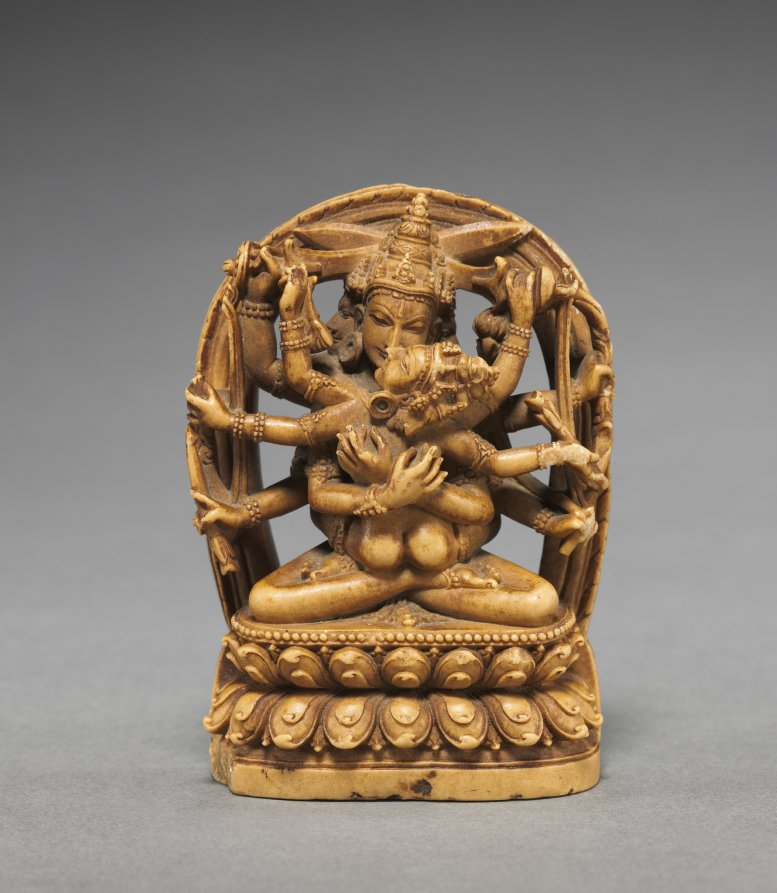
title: Manjuvara with consort (yab-yum)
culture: Tibet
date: c. 1100s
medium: Kaolin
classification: Sculpture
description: This miniature stele shows Manjuvara, a form of the the Bodhisattva of Wisdom Manjushri, in union (yab yum) with his consort (sakti). The intimacy between the deities, in accordance with Vajrayana Buddhism, is symbolic of the union between wisdom and compassion that leads to the bliss of enlightenment. Both figures have three heads and six arms holding their attributes: a sword (khadga), a bow (dhanus), an arrow (bana), and a lotus (padma). The sculpture is made in kaolinite, a clay-based stone frequently used in the northern regions of India and Burma. The exceptionally fine carving, executed with great precision and attention to detail, reflects the Pala style instrumental in the development of the Himalayan schools of sculpture.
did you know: A devotee would have carried this small devotional item as a personal, portable shrine.